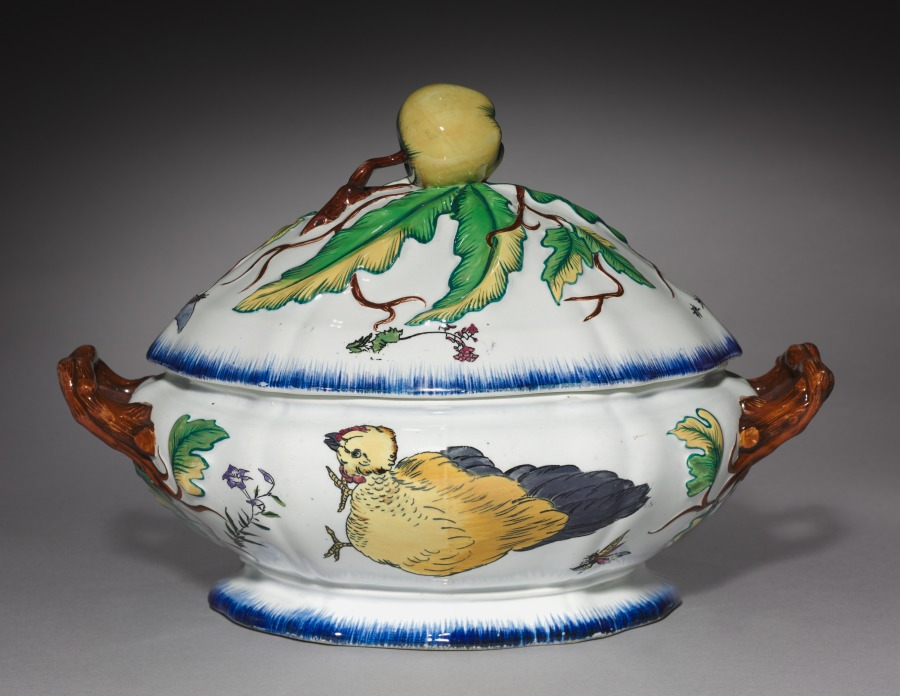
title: Covered Tureen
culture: France, Creil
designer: Félix Bracquemond (French, 1833–1914)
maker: Creil Factory (French)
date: 1866–75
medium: porcelain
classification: Ceramic